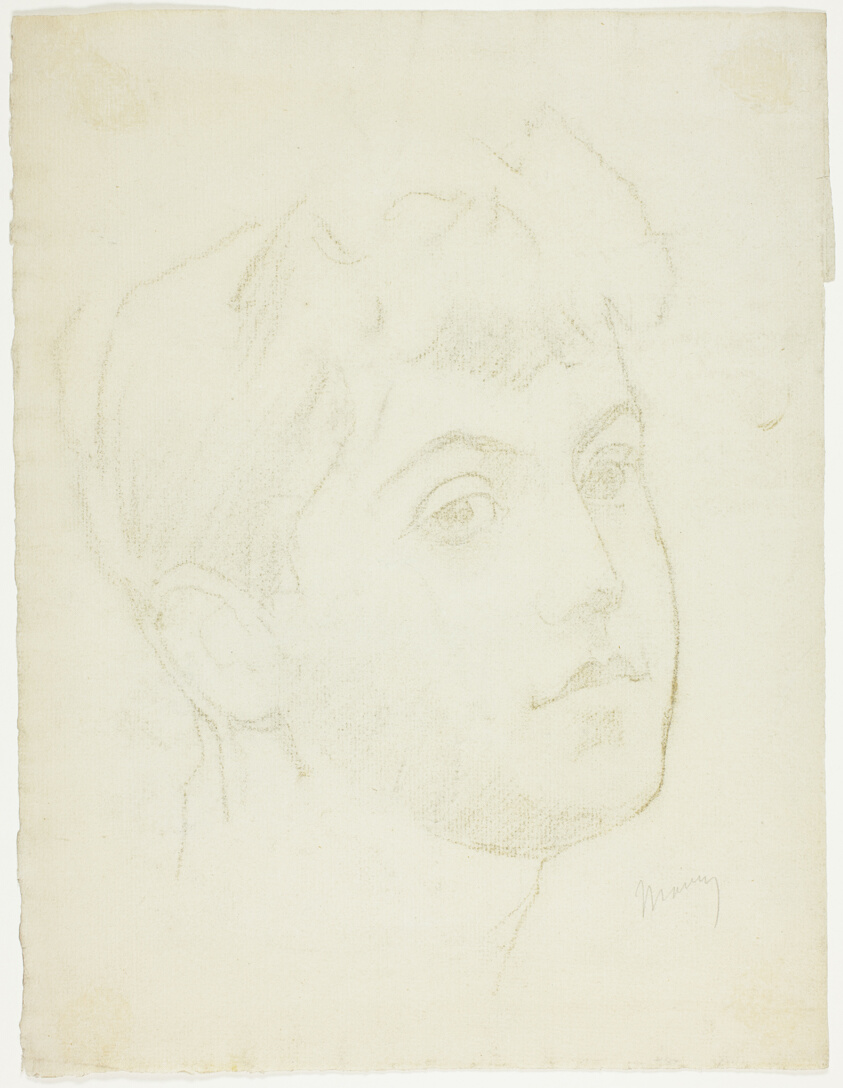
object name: Drawing and Watercolor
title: Portrait Head of a Young Woman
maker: Charles Maurin (French, 1856-1914)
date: c. 1900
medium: Black chalk on ivory laid paper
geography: France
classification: chalk; paper; prints and drawing